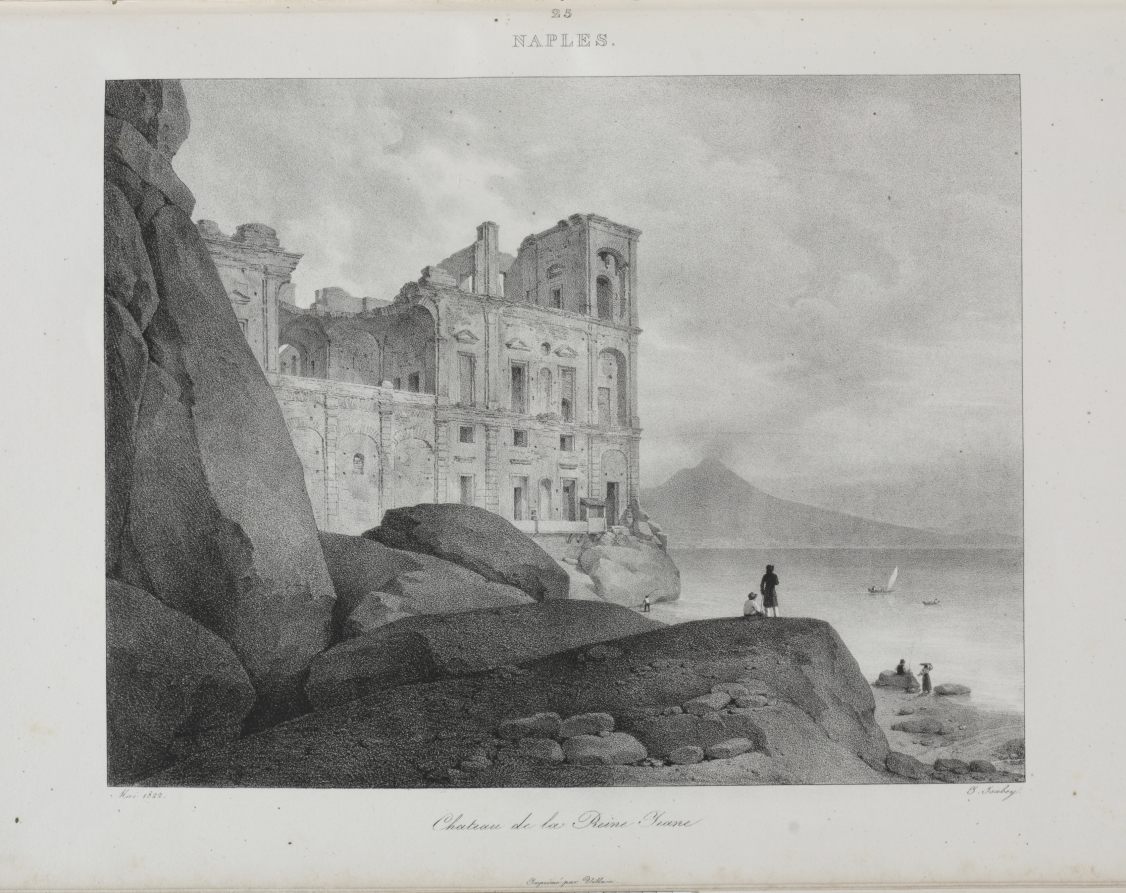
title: Voyage en Italie en 1822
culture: France, 19th century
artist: Jean-Baptiste Isabey (French, 1767–1855)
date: 1833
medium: lithograph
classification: Bound Volume